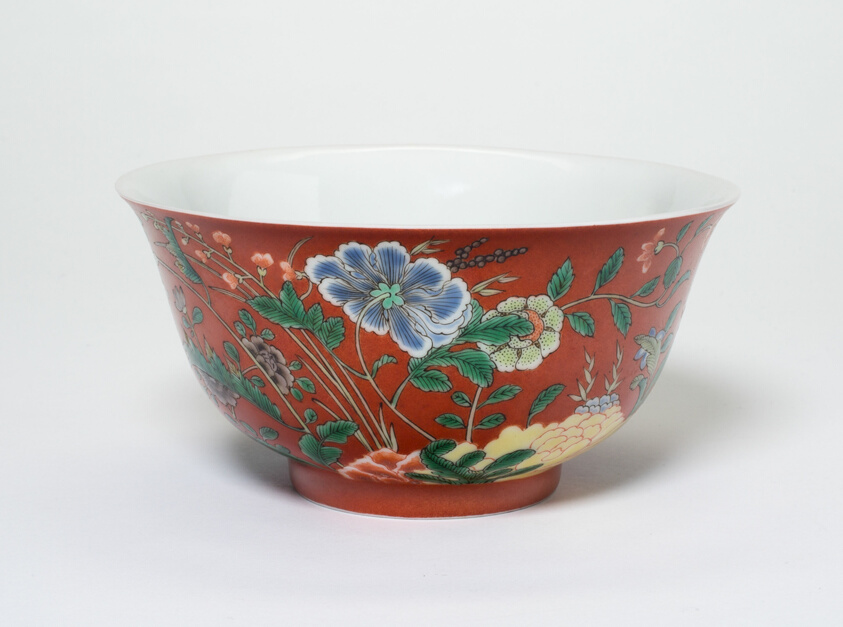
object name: Vessel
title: Bowl with Flowers on a Coral-Red Ground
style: Chinese (culture or style)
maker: China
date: Qing dynasty (1644–1911), Yongzheng reign mark (1723–1735)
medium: Porcelain painted in overglaze enamels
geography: China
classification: bowl; dish (vessel); ceramics; vessel